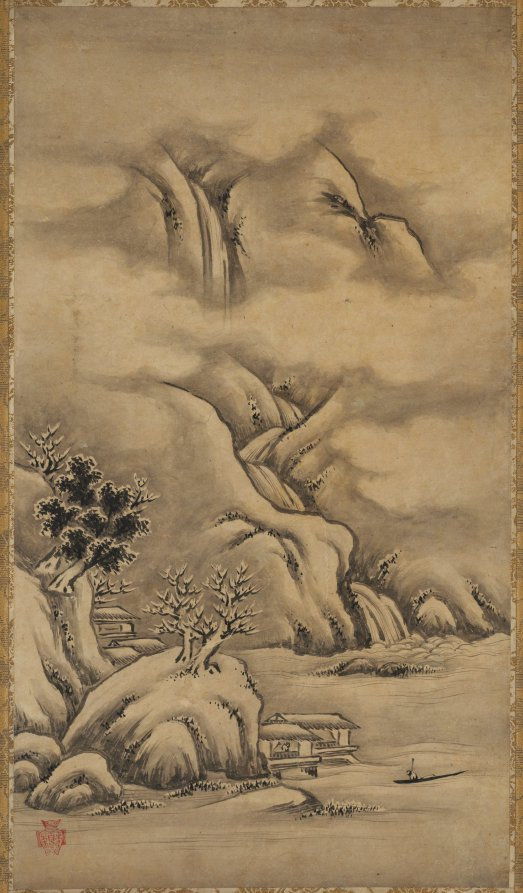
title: Seasonal Landscapes: Winter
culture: Japan, Muromachi period (1392–1573)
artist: Kano Hideyori (Japanese, active mid- to late 1500s)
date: mid- to late 1500s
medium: hanging scroll, ink on paper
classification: Painting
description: Now comprising three scrolls, this composition was originally a set of four paintings depicting the seasons. The set is among the most important of the artist’s surviving works. Each painting was executed in the gyō mode, indicating a speedy brush with rounded strokes. The terms shin (formal), sō (cursive), and gyō (semicursive), borrowed from calligraphy terminology, are terms commonly used by connoisseurs to describe brushwork in ink paintings.